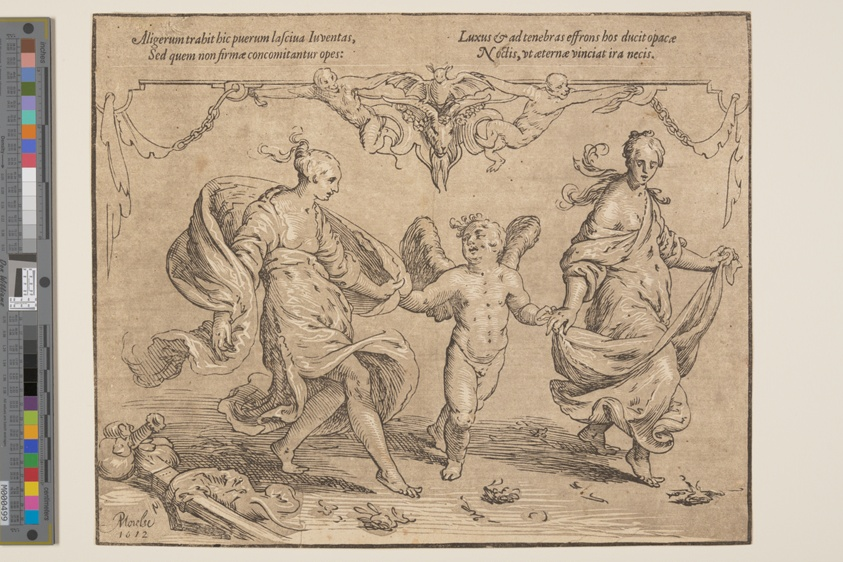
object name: Print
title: Cupid with Youth and Luxury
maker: Paulus Moreelse (Dutch, 1571–1638)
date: 1612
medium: Chiaroscuro woodcut from two blocks, with letterpress text, on ivory laid paper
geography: Netherlands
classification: print; paper; prints and drawing; chiaroscuro woodcut